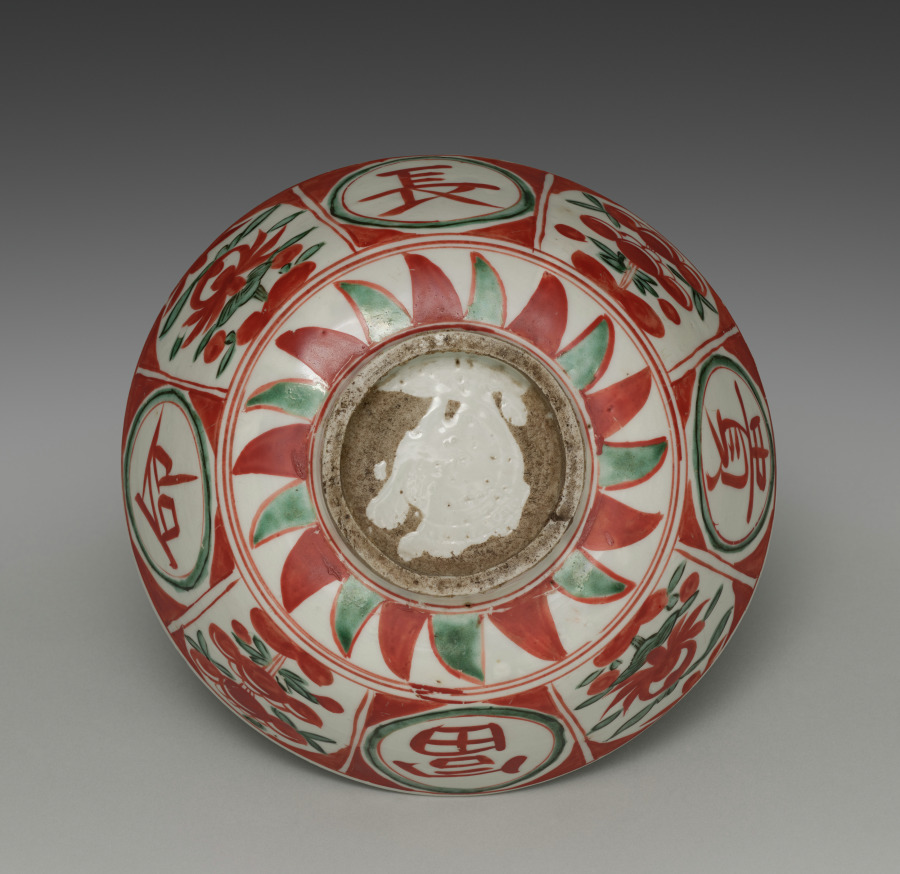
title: Bowl with Auspicious Ideographs and Floral Motifs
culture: China, Ming dynasty (1368–1644)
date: 1600s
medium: Stoneware with overglaze color enamels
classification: Ceramic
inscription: 長,命,富,貴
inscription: 【印】清風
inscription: 【印】大日本清風造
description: As part of their work, members of the Seifu studio, and Seifū Yohei III (三代清風与平, Japanese, 1851–1914), in particular, engaged in the viewing and appreciation of Chinese ceramics. While they were not authenticators, they would have been familiar with imported examples of Chinese stoneware and porcelain through tea gatherings, meetings with their elite clients, exhibitions, and other opportunities to see and study actual pieces from the mainland. This object and its box may be a reflection of Yohei III’s experiences of this kind. The bowl itself is slightly misshapen and roughly glazed with overglaze color enamels in red and green. Flanked by floral motifs, four Chinese characters brushed in red appear in roundels: 長命富貴. Meaning, respectively, longevity, life, prosperity, and status, they are pronounced together in Japanese as the phrase chōmeifūki, or “live long and prosper.” Additional loosely painted foliate designs in red and green circle the area above the foot and inside of the bowl. It is a relatively simple piece made by someone who was likely capable of much finer, more precise work but who could also do completely passable wares on short order. Of greater interest is the storage box lid for this piece. It has an inscription by Yohei III, with his seal, declaring it to be a “sweets dish from southern China with color images.” On the reverse of the lid, Yohei has written his name and placed his Imperial Household Artist seal, but instead of writing “made by,” he wrote “saw this [ceramic].” To the left of this is another inscription in a different hand, stating that the piece is a work from southern China with red-painted designs, produced at the very end of the Ming dynasty. It is signed “Kushi Takushin 久志卓真," along with his seal. Kushi Takushin (1898–1973) was a Japanese musician and music critic, as well as an antiques researcher and authenticator. He was especially interested in Ming dynasty Chinese ceramics and wrote extensively on Chinese, Japanese, and Korean ceramics. Originally from Hokkaido, he was active in Kyoto and began collecting art at a young age. Both he and Yohei appreciated and commented upon the bowl, and perhaps they both owned it.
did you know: Each roundel contains an auspicious word conveying good wishes for a long life and wealth.